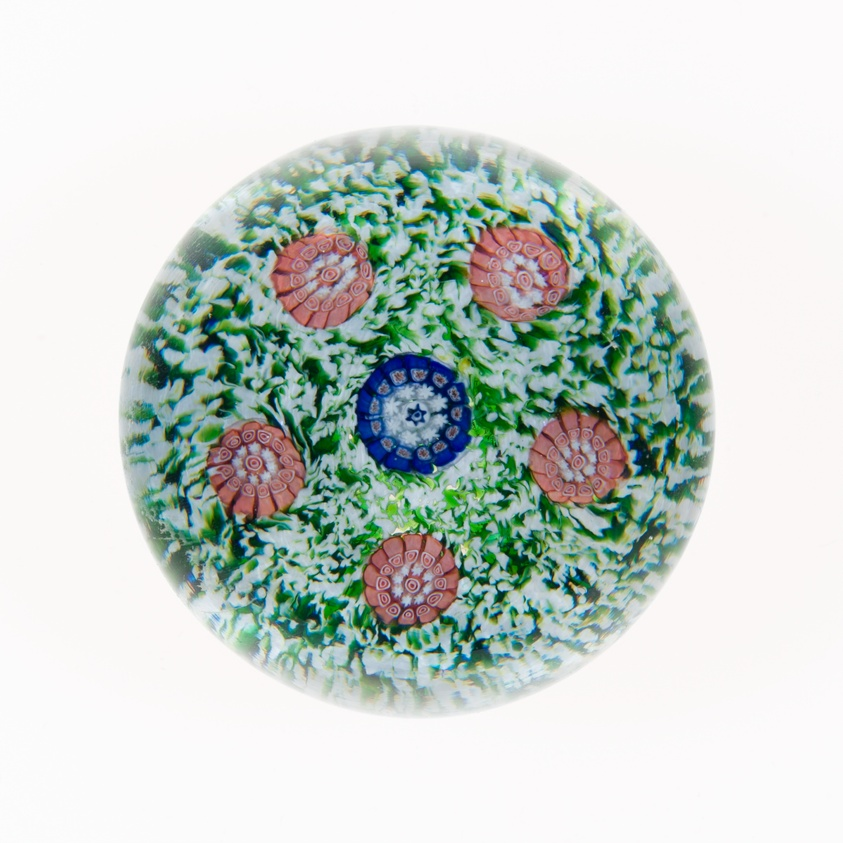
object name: Glass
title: Paperweight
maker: Saint-Louis Glassworks (Cristalleries de Saint-Louis); Lorraine, France, founded 1586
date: 19th century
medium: Glass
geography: Saint-Louis-lès-Bitche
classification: paperweight; glass